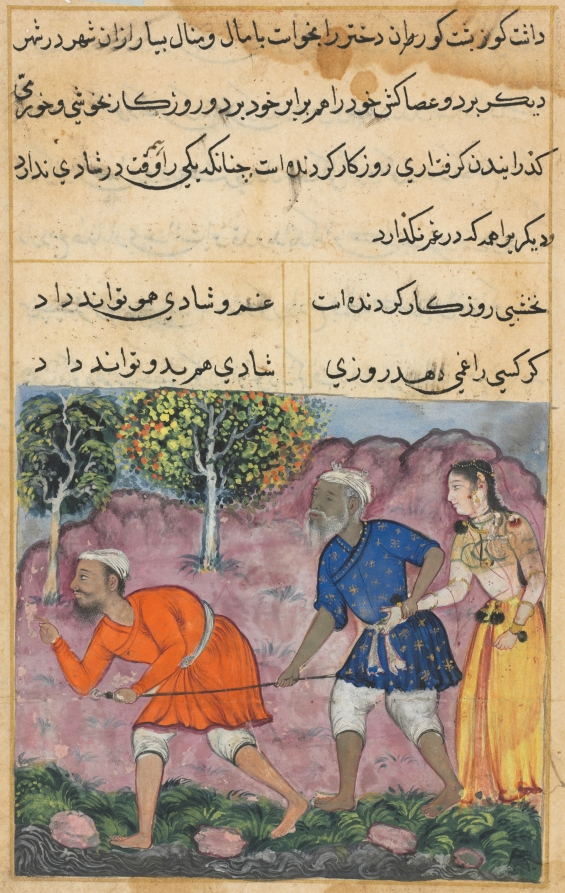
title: The Raja’s daughter, born with three breasts, accompanies her blind husband and his hunchback guide on a journey, from a Tuti-nama (Tales of a Parrot): Forty-second Night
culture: Mughal India, court of Akbar (reigned 1556–1605)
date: c. 1560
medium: gum tempera, ink, and gold on paper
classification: Painting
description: The blind man clutches tightly to the hunchback’s staff with one hand and his wife’s arm with the other. At the front of the group, the hunchback points ahead to their ultimate destination—a city far from where the raja’s daughter was born. This image represents a story within the story that is being told by a parrot to the merchant’s son ‘Ubaid in order to cure his infatuation with his wife.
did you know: The woman was forced to leave home after soothsayers predicted that she would someday harm her father.